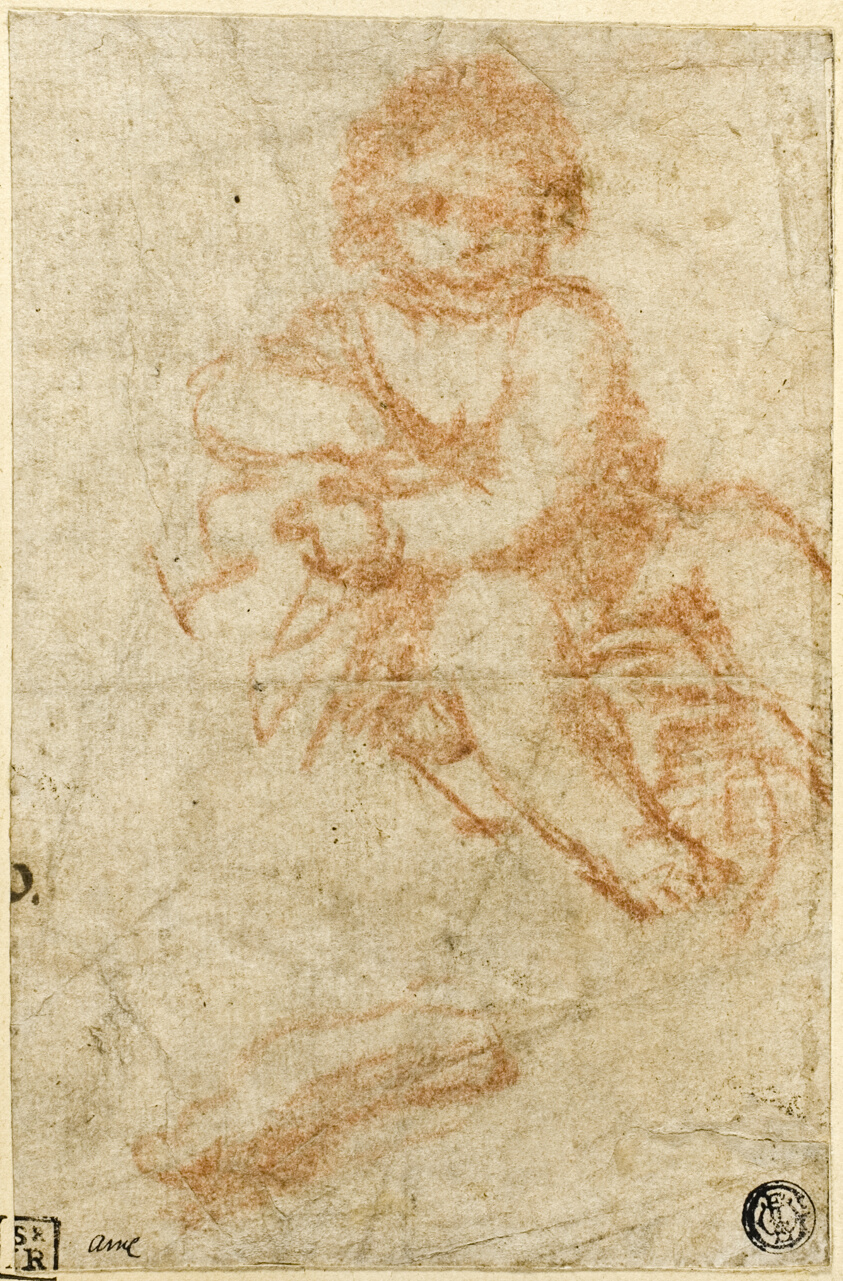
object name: Drawing and Watercolor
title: Study for Christ Child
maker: Giacomo Cavedone (Italian, 1577-1660)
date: 1610/12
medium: Red chalk on ivory laid paper, laid down on cream laid paper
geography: Italy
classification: chalk; drawings (visual works); prints and drawing